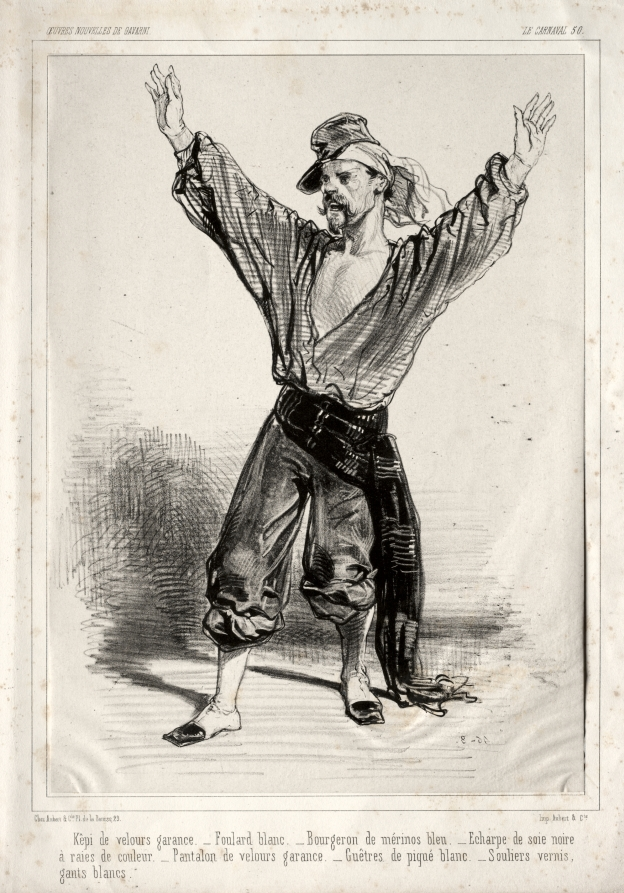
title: Carnaval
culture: France, 19th century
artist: Paul Gavarni (French, 1804–1866)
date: c. 1841–47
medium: lithograph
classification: Print